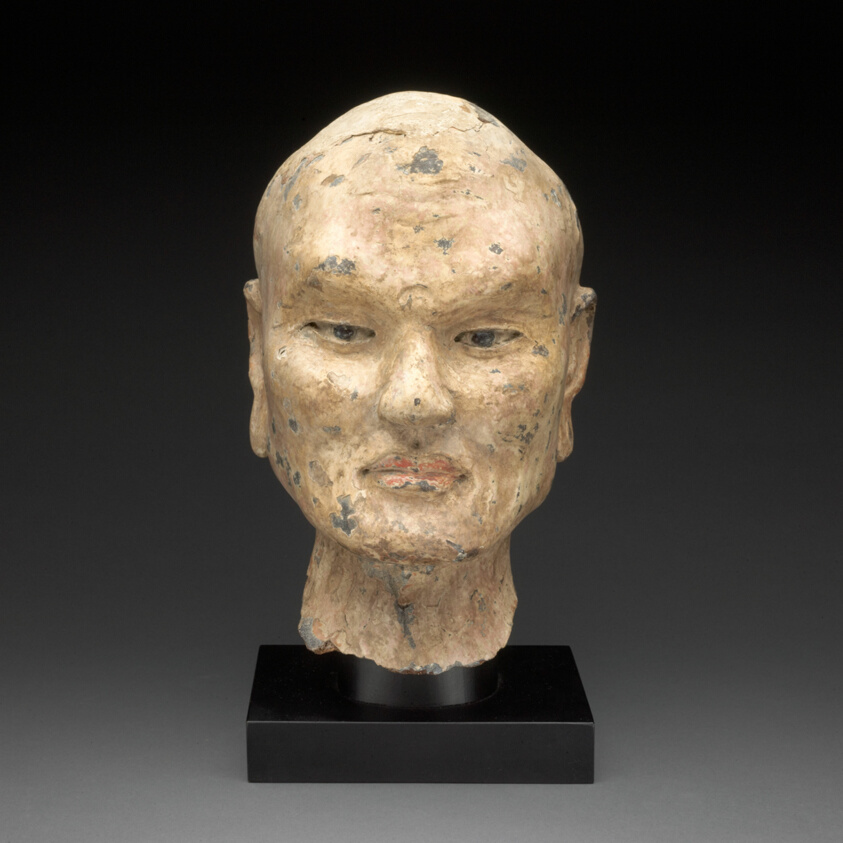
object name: Sculpture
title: Head of Luohan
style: Chinese (culture or style)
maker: China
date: Northern Song, Liao, or Jin dynasty, c. 11th century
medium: Hollow dry lacquer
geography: China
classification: lacquer; sculpture; asian art